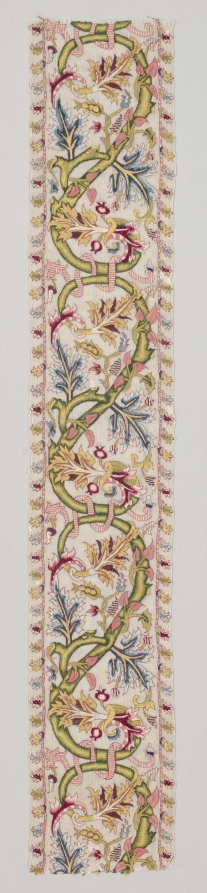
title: Embroidered Strip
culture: Italy, late 16th century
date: late 1500s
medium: embroidery; silk on linen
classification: Textile